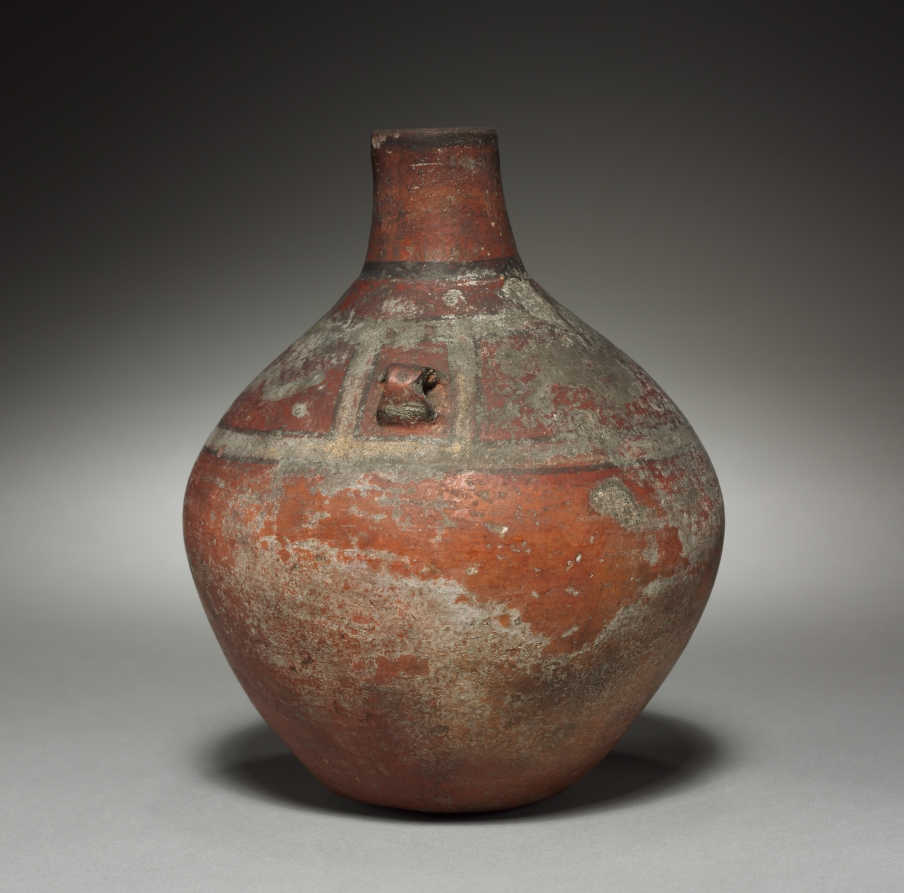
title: Bottle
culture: Peru, Pachacamac, Tiwanaku style, 400-1000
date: 400–1000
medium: pottery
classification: Ceramic